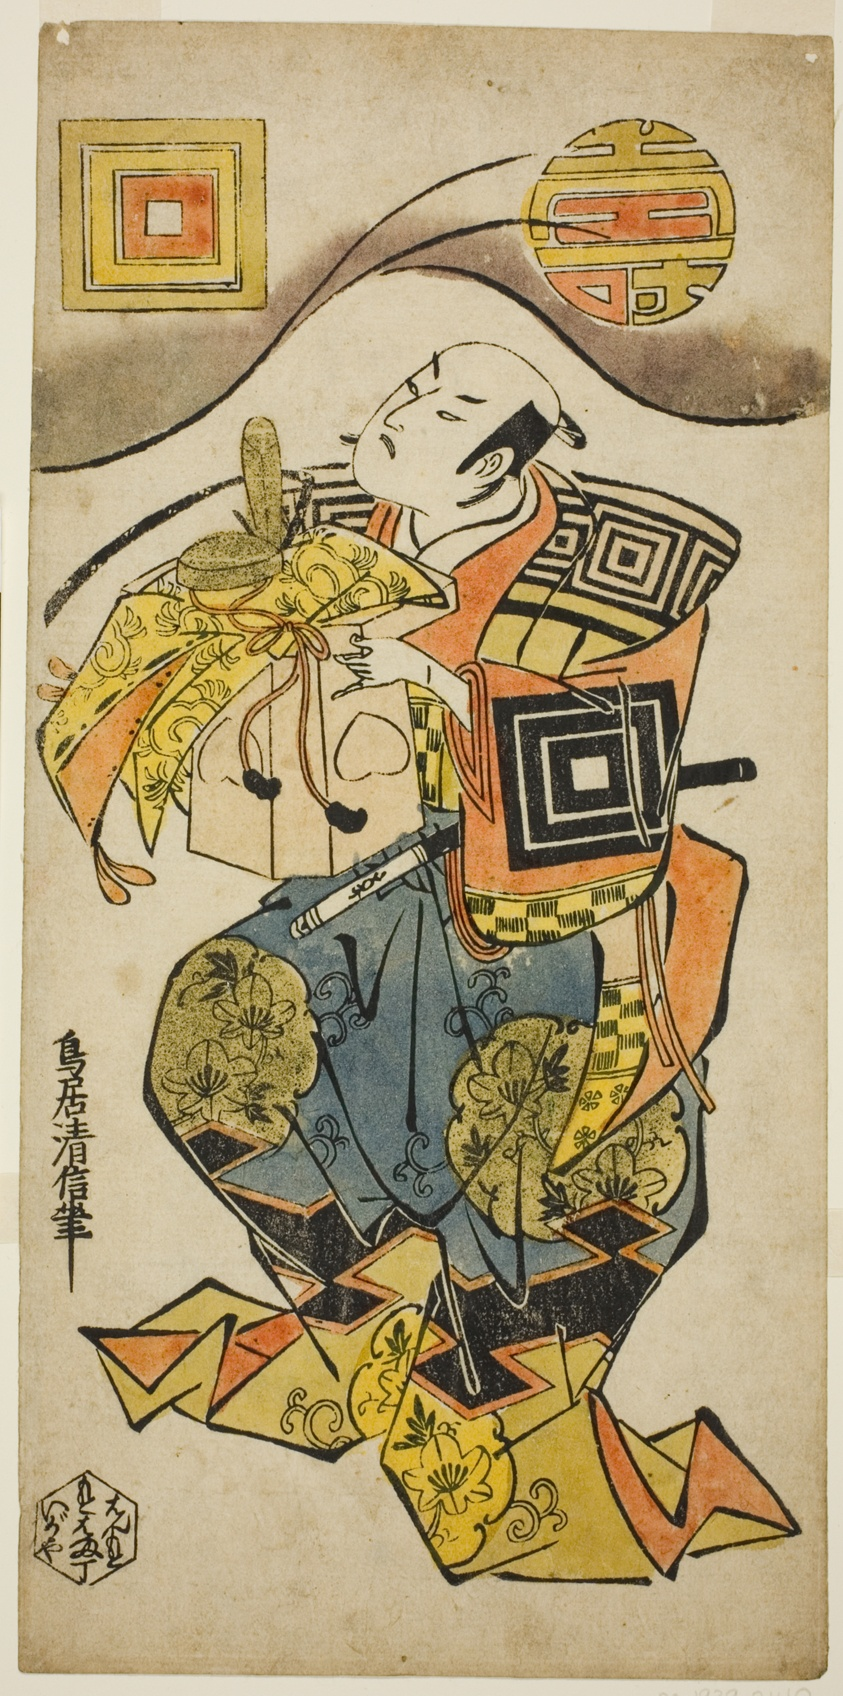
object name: Print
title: The Actor Ichikawa Danjuro II as Soga no Juro in the play "Hanabusa Bunshin Soga," performed at the Ichimura Theater in the first month, 1733 (?)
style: Japanese (culture or style)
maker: Torii Kiyonobu II (Japanese, active c. 1725-61)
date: c. 1733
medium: Hand-colored woodblock print; hosoban, urushi-e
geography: Japan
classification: woodblock print; print; asian art